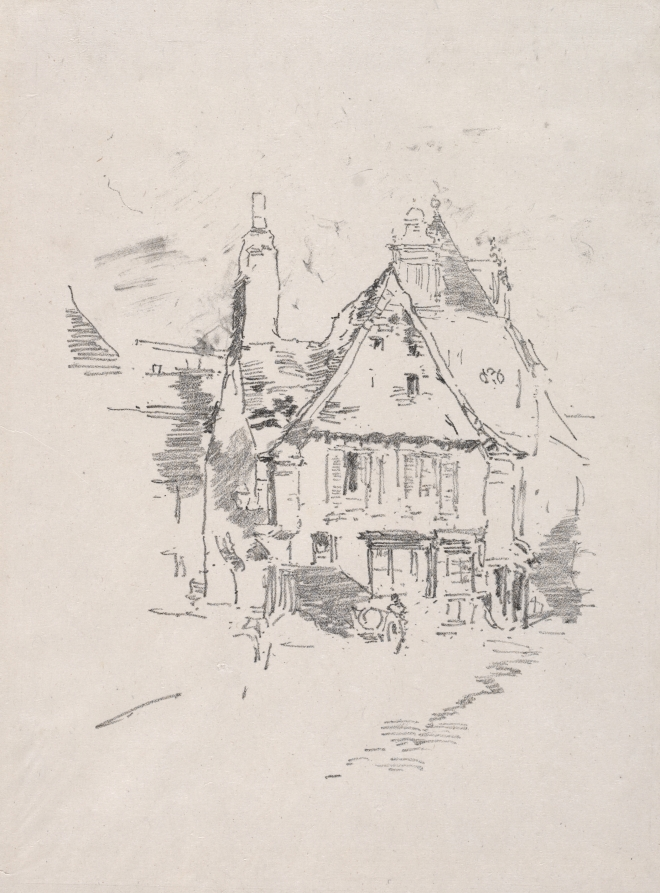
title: Gabled Roofs, Vitré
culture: America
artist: James McNeill Whistler (American, 1834–1903)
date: 1893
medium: lithograph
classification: Print